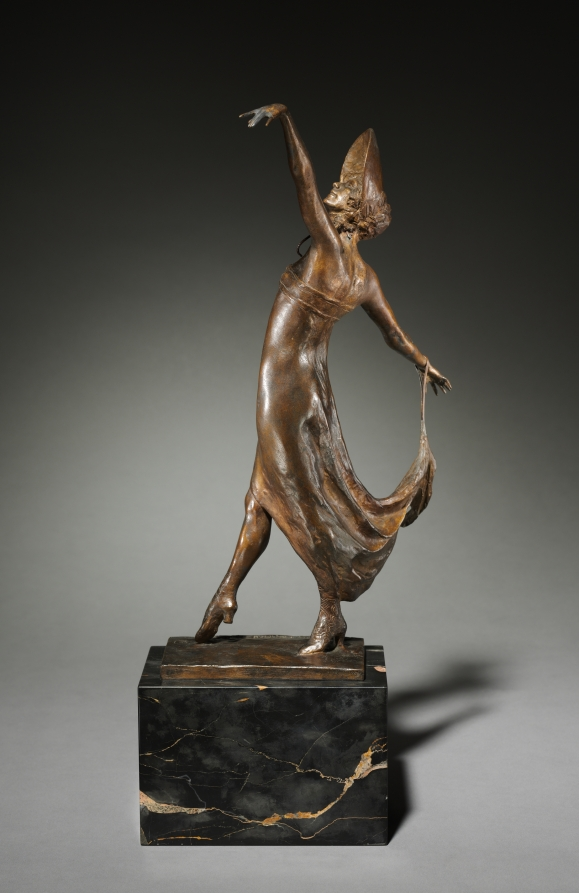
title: Pavlova Dancing the Gavotte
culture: America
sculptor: Malvina Hoffman (American, 1887–1966)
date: 1915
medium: bronze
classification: Sculpture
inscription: Signed on base: "Malvina Hoffman 1915, IX ©"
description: Sculptor Malvina Hoffman met the acclaimed Russian ballerina Ana Pavlova in New York during the spring of 1914. This bronze rendering of the dancer, posed with broadly outstretched arms, was created the following year. At the time, Pavlova was attempting to popularize a Russian version of the French folk dance known as the gavotte.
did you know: A pavlova is a meringue-based dessert inspired by the shape of ballerina Anna Pavlova's tutu.